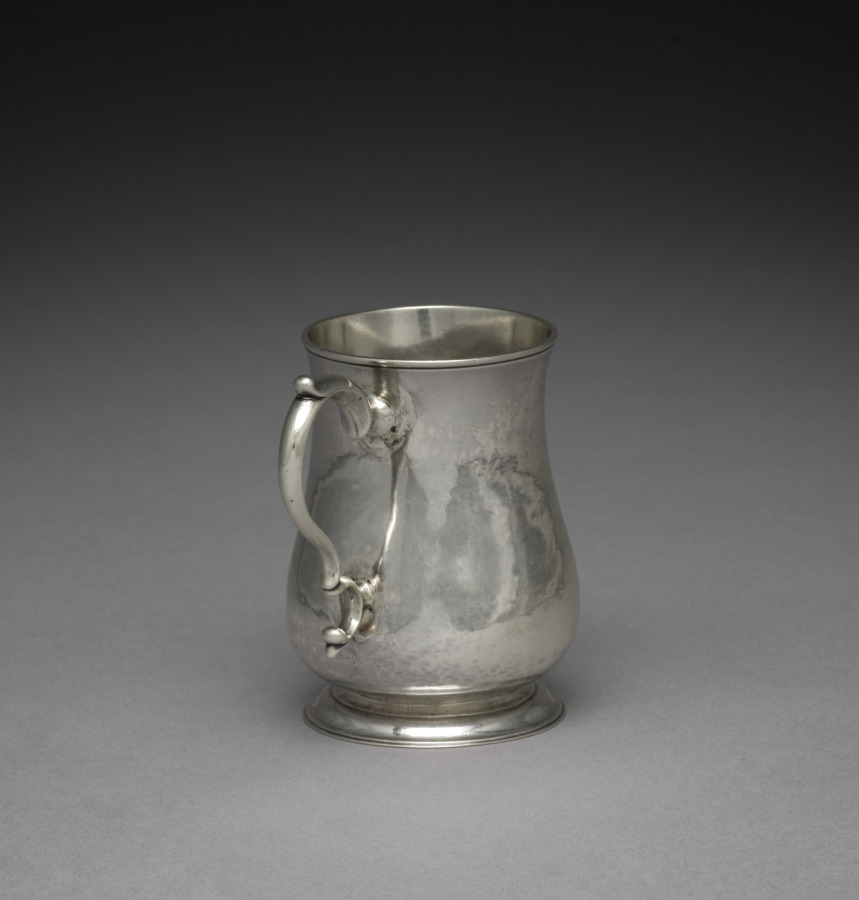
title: Cann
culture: America, Massachusetts, Boston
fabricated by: Benjamin Pierpont (American, 1730–1797)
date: c. 1760–70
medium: silver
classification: Silver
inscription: engraved "A*G" in block letters on bottom.